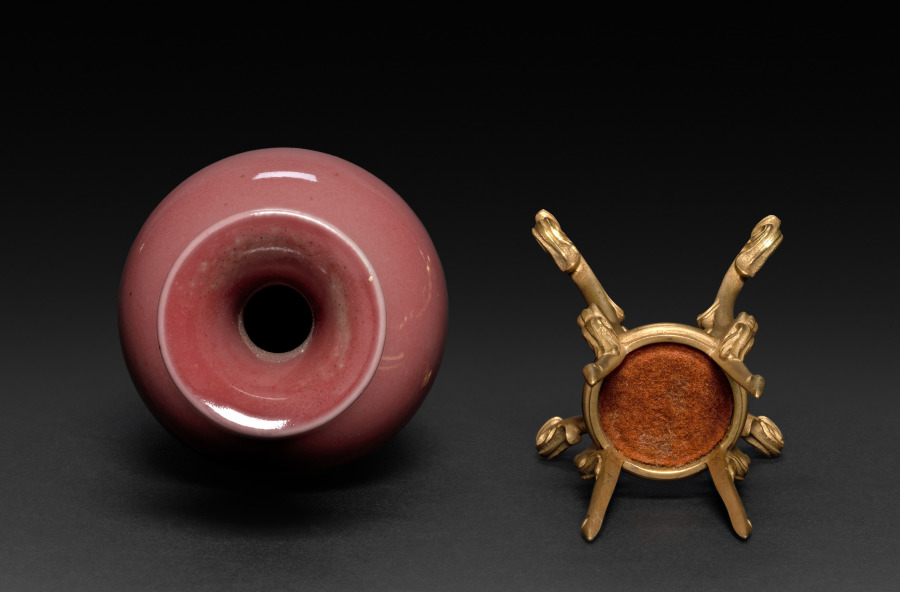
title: Bottle with Peach Bloom Glaze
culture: China, Qing dynasty (1644-1911), Kangxi reign (1661-1722)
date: 1662–1722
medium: porcelain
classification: Ceramic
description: The "peach-bloom" glaze developed during the Kangxi era has also been described as "drunken with beauty." Technical achievements were transcended with aesthetic associations, revealing the greatest sensitivity to all things beautiful in nature.